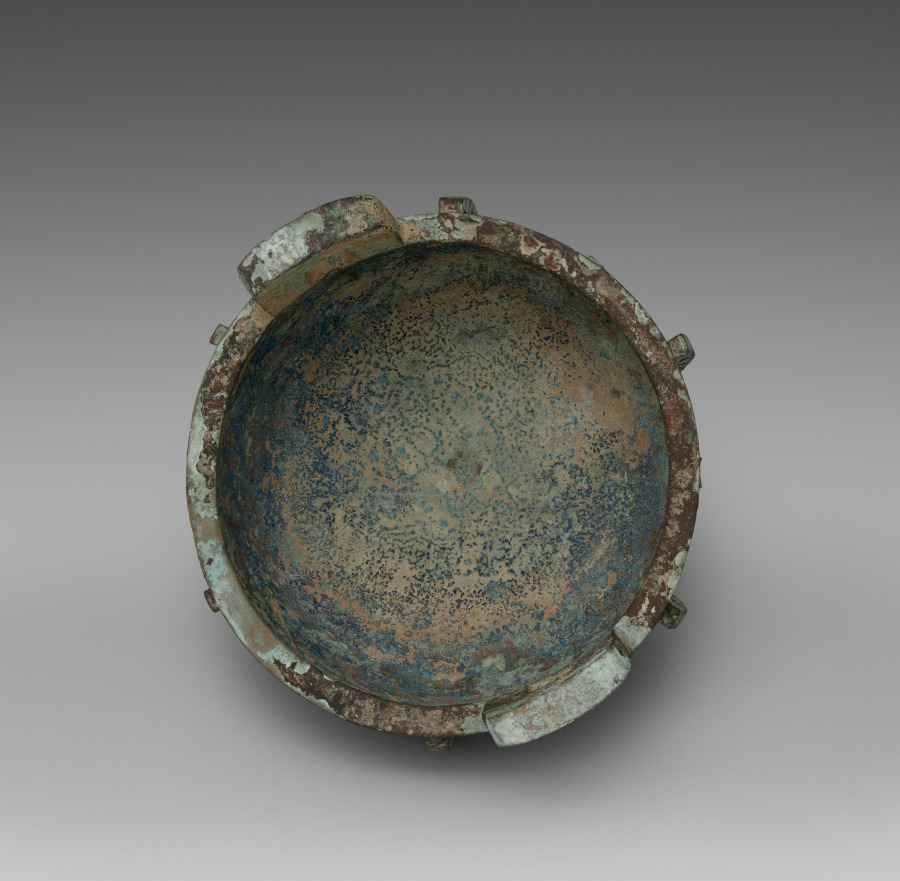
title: Tripod (Ding)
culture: China, Shang dynasty (c. 1600–c. 1046 BCE), Anyang phase (c. 1250–1046 BCE)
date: c. 1250–1046 BCE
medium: bronze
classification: Metalwork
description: Animal images in ritual bronzes served as symbolic messengers of the supernatural realms. Among others, the animal mask called taotie emerged as the most potent symbolic form. The formidable mask emanates a powerful presence with an unforgettable stare. It expresses an overwhelming feeling of mystery, representing a transcendent, supernatural concept in ancient ritual art.